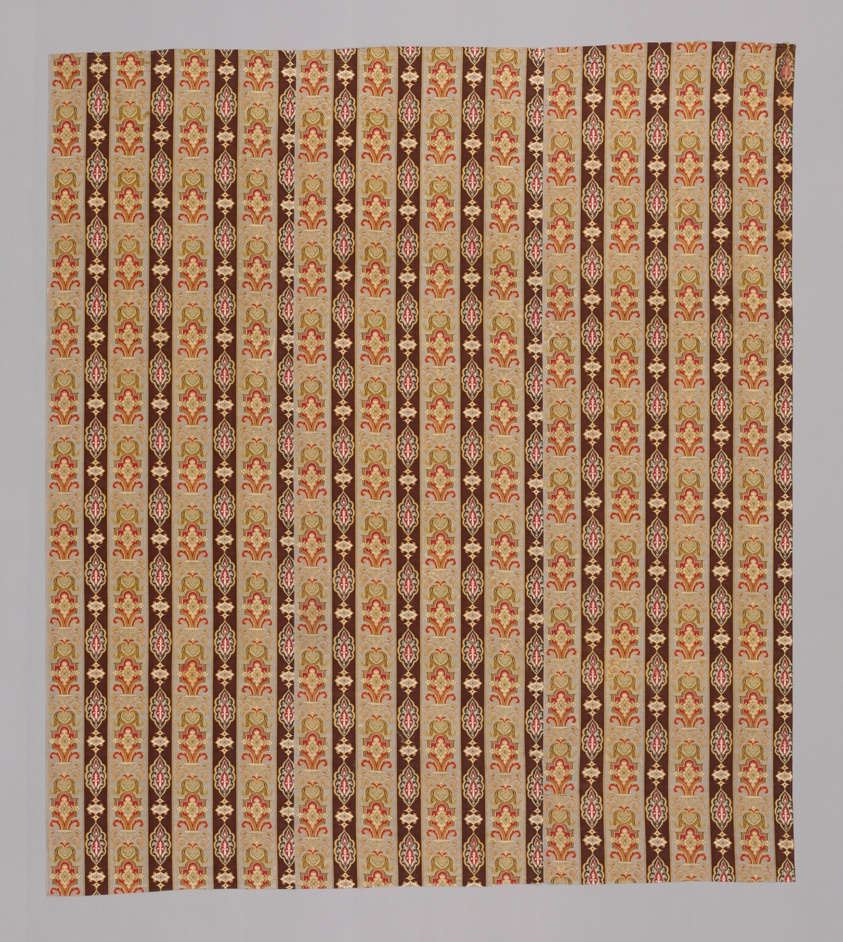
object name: Textile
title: Panel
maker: England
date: c. 1860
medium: Cotton, plain weave; printed; acorn tassel fringe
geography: England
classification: textile; weaving - printed